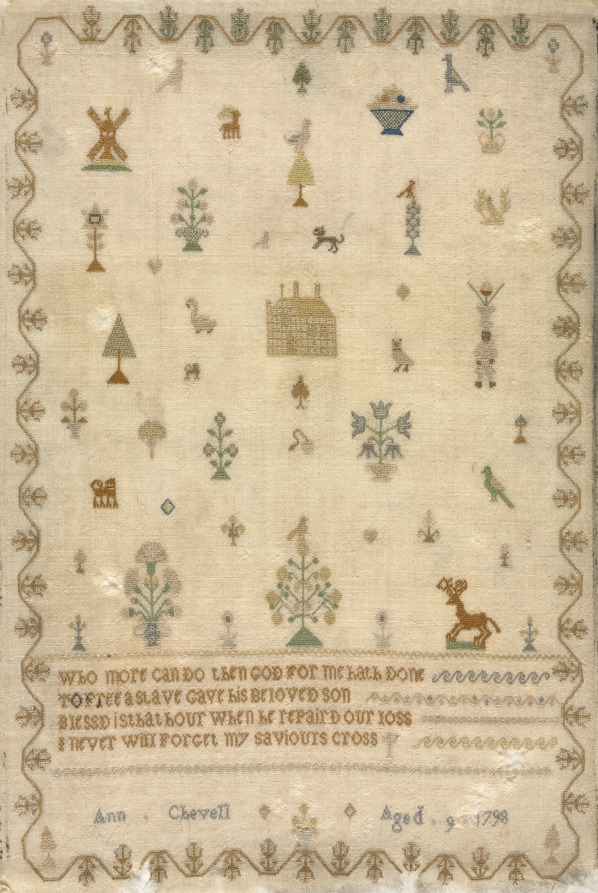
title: Sampler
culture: England, 18th century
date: 1798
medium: silk embroidery on wool, cross stitch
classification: Sampler